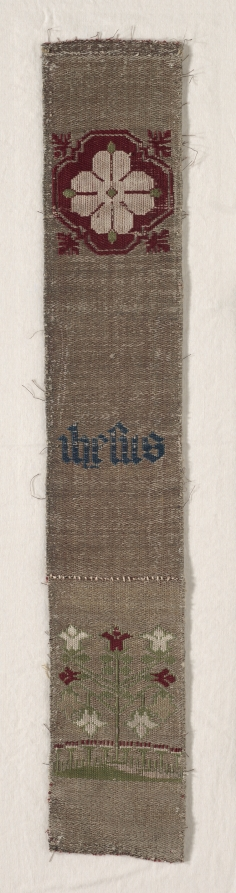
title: Fragment of a Band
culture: Germany, Cologne, 14th-15th century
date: 1300s–1400s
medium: Linen, silk, metal-wrapped thread: compound twill weave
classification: Textile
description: The Cleveland Museum of Art has a number of band fragments that may have been created in a workshop in Cologne, Germany, on the Rhine River. They may have been produced in series and could be adapted for various contexts. Such bands are found, for example, in very similar form on the nearby chasuble, or sleeveless outer vestment. The inscriptions Jesus and Mary on the bands also point to such a use.